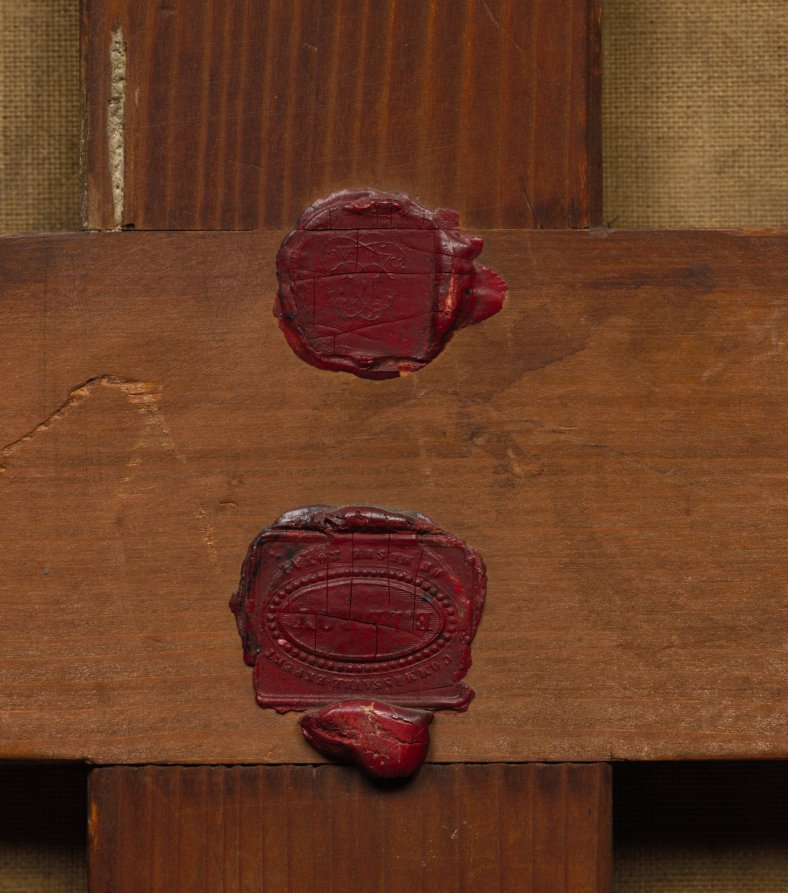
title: Landscape with a Church by a Torrent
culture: Netherlands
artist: Jacob van Ruisdael (Dutch, 1628/29–1682)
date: c. 1670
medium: oil on canvas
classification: Painting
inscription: Signed lower right: JvRuisdael [JvR in monogram]"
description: It is not known if Ruisdael considered his paintings to be social or moral commentary, for no documents from his lifetime indicate how the artist or his patrons interpreted the works. But in this painting dangerous rapids block access to the chapel, and severed logs litter the middleground, hinting at life’s transience and the challenge to reach salvation.